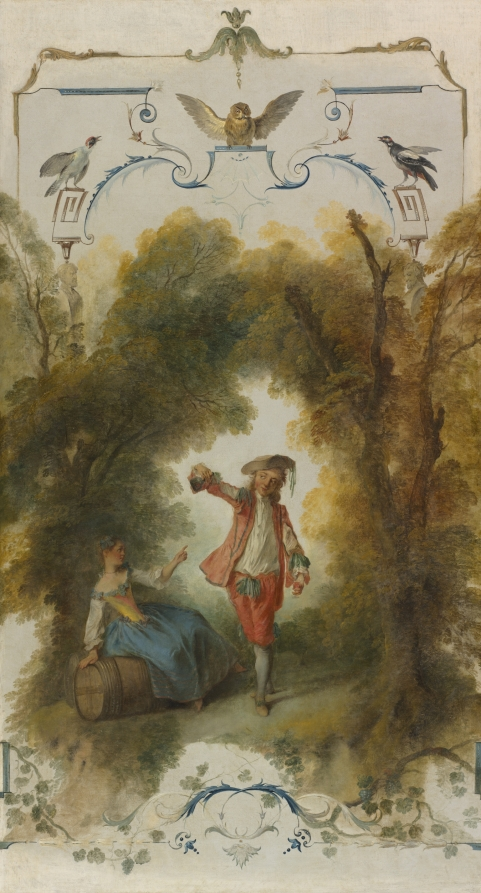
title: The Vineyard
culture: France, 18th century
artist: Nicolas Lancret (French, 1690–1743)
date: c. 1723–1727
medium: oil on canvas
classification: Painting